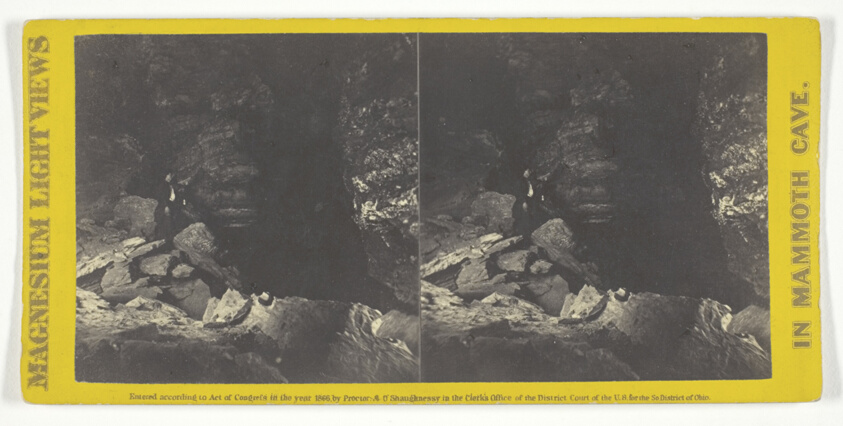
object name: Photograph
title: "Ole Bull's Concert Room", No. 34 from the series "Mammoth Cave Views"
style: 19th century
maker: Chas. Waldack (American, active 1860s)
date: 1866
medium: Albumen print, stereo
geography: New York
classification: photography; photograph